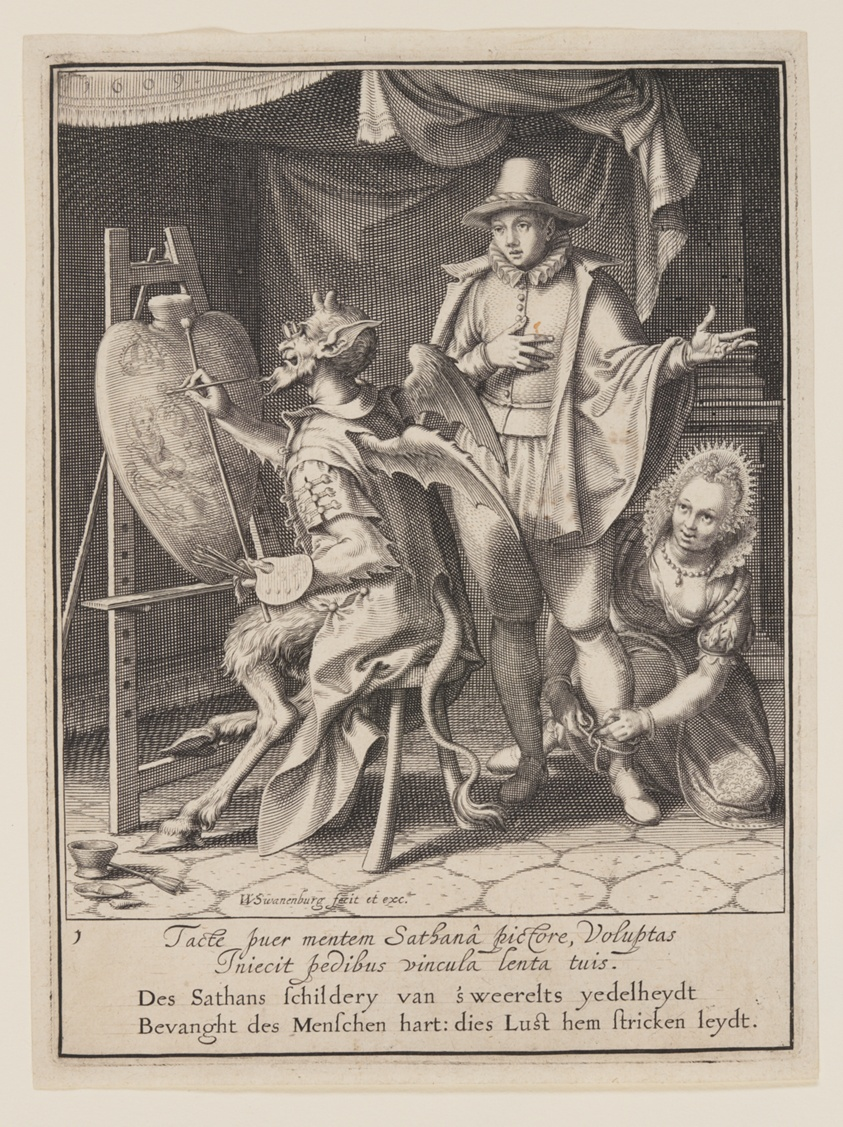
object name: Print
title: The Devil Painting Man’s Heart, from Allegory of the Misuse of Worldly Property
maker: Willem van Swanenburgh (Dutch, 1580–1612); after Maerten van Heemskerck (Dutch, 1498–1574)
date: 1609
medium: Engraving on ivory laid paper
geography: Netherlands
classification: engraving; paper; print; prints and drawing